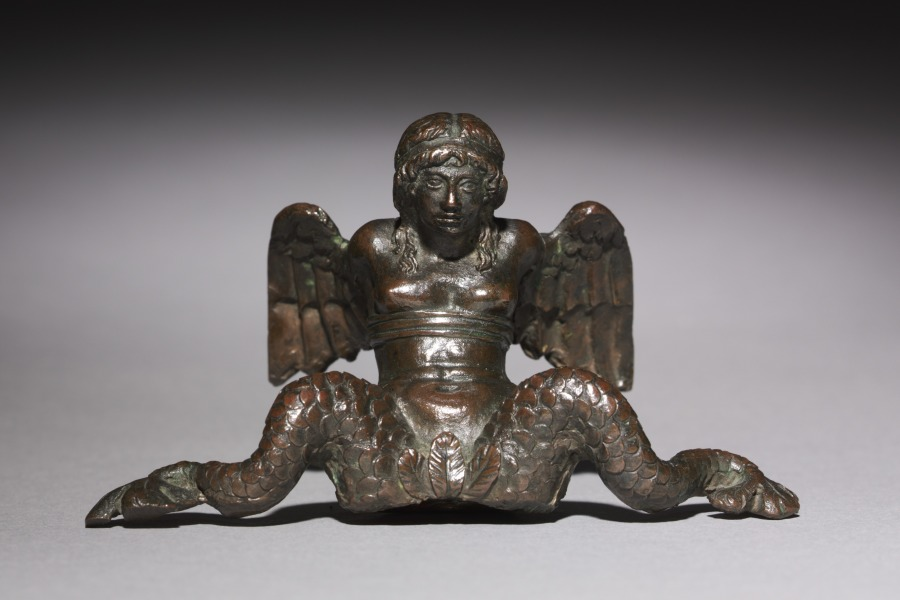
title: Doorpull (pair)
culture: Italy, 16th century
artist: Leone Leoni (Italian, 1509–1590)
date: 16th century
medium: bronze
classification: Sculpture